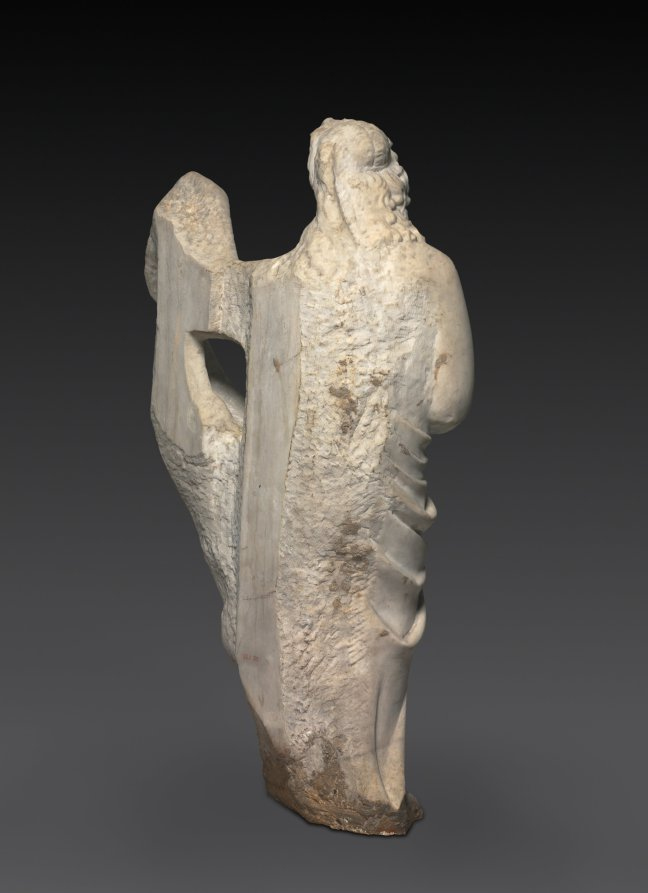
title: Angel from a Tomb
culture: Italy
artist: workshop of Tino di Camaino (Italian, c. 1285–1337)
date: 1330–50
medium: marble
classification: Sculpture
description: Tino da Camaino was active in Siena, Pisa, and Florence after 1311 where he established his reputation as an important and gifted sculptor. In 1323 he was summoned to the Angevin court at Naples, probably by King Robert of Anjou to work on the sepulchral monument of the king's daughter-in-law, Catherine of Austria. During the remainder of his life, Tino created a remarkable series of tomb sculptures in Naples. This pair of marble angels most likely represents the work of a member of Tino's workshop produced for one of these Neapolitan tombs, either during the final years of the master's life, or else independently after Tino's death in 1337.